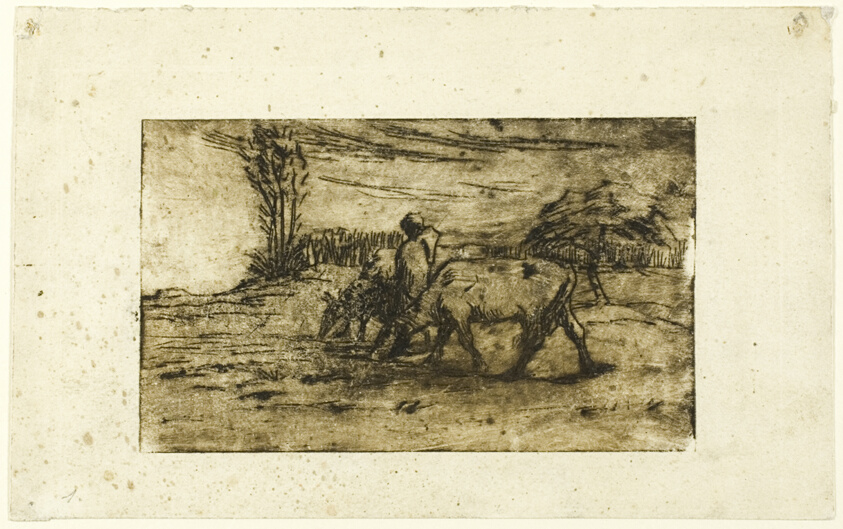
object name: Print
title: The Two Cows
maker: Jean François Millet (French, 1814-1875)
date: c. 1847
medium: Etching and drypoint on ivory wove paper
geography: France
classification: etching; print; prints and drawing